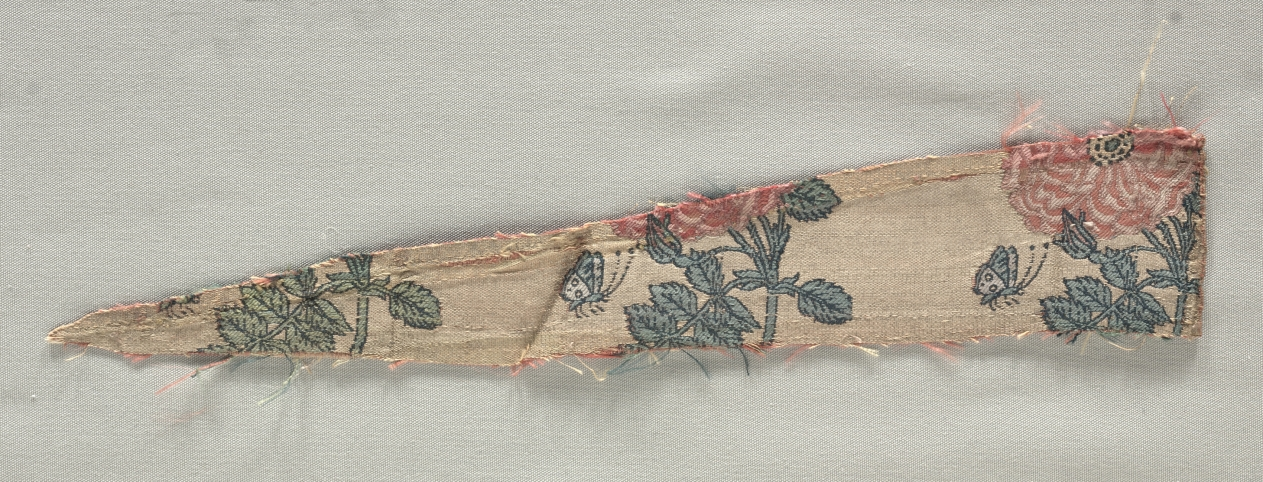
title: Fragment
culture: Iran, early 17th century (period of Shah Abbas)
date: early 1600s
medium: compound tabby ground with diasper pattern, brocaded; silk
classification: Textile